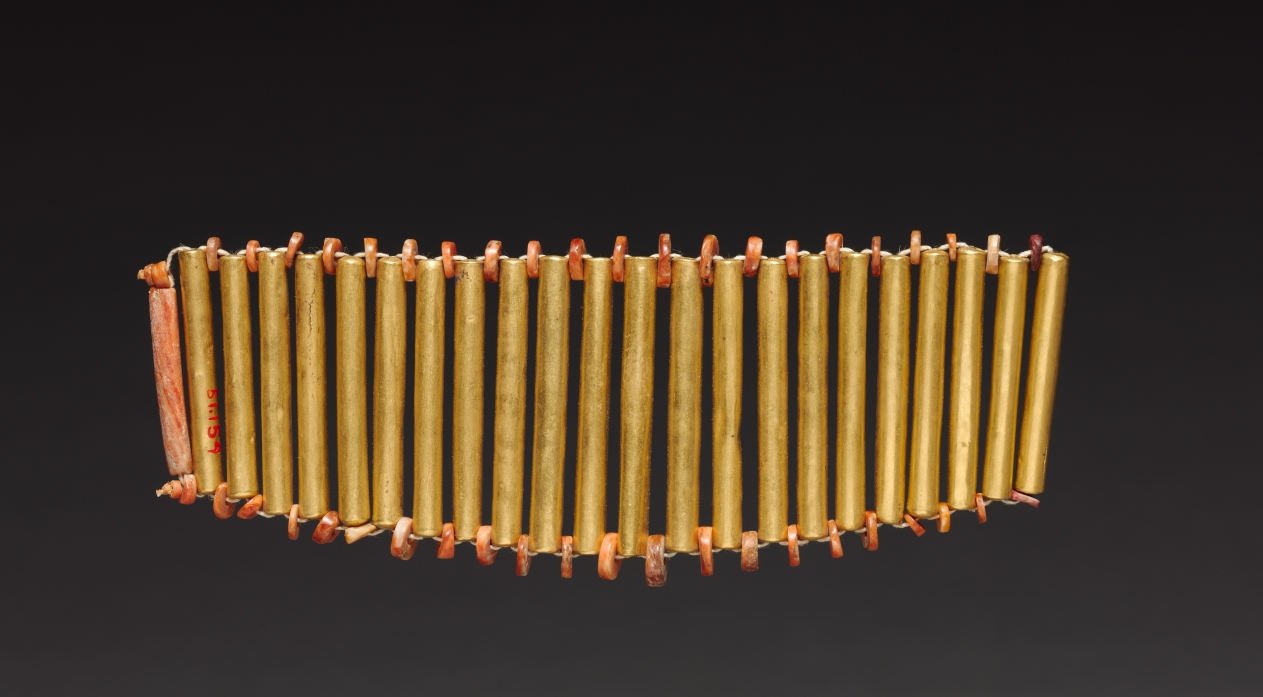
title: Bracelet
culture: Central Panama, (Sitio Conte?), Conte Style, 5th century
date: c. 400–500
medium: gold and shell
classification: Jewelry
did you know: These ancient beads were restrung in modern times.